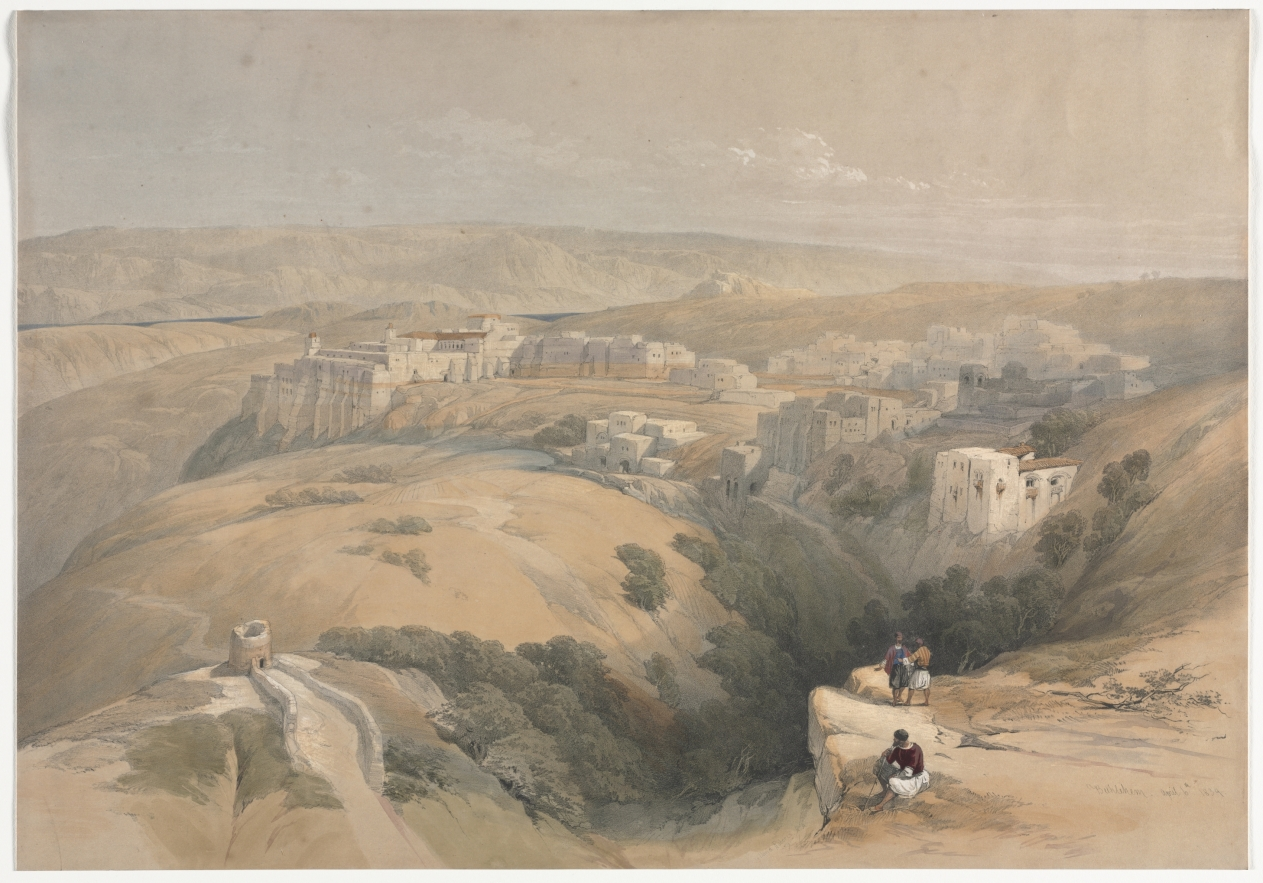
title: Bethlehem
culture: England, 19th century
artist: David Roberts (Scottish, 1796–1864)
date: 1839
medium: color lithograph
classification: Print